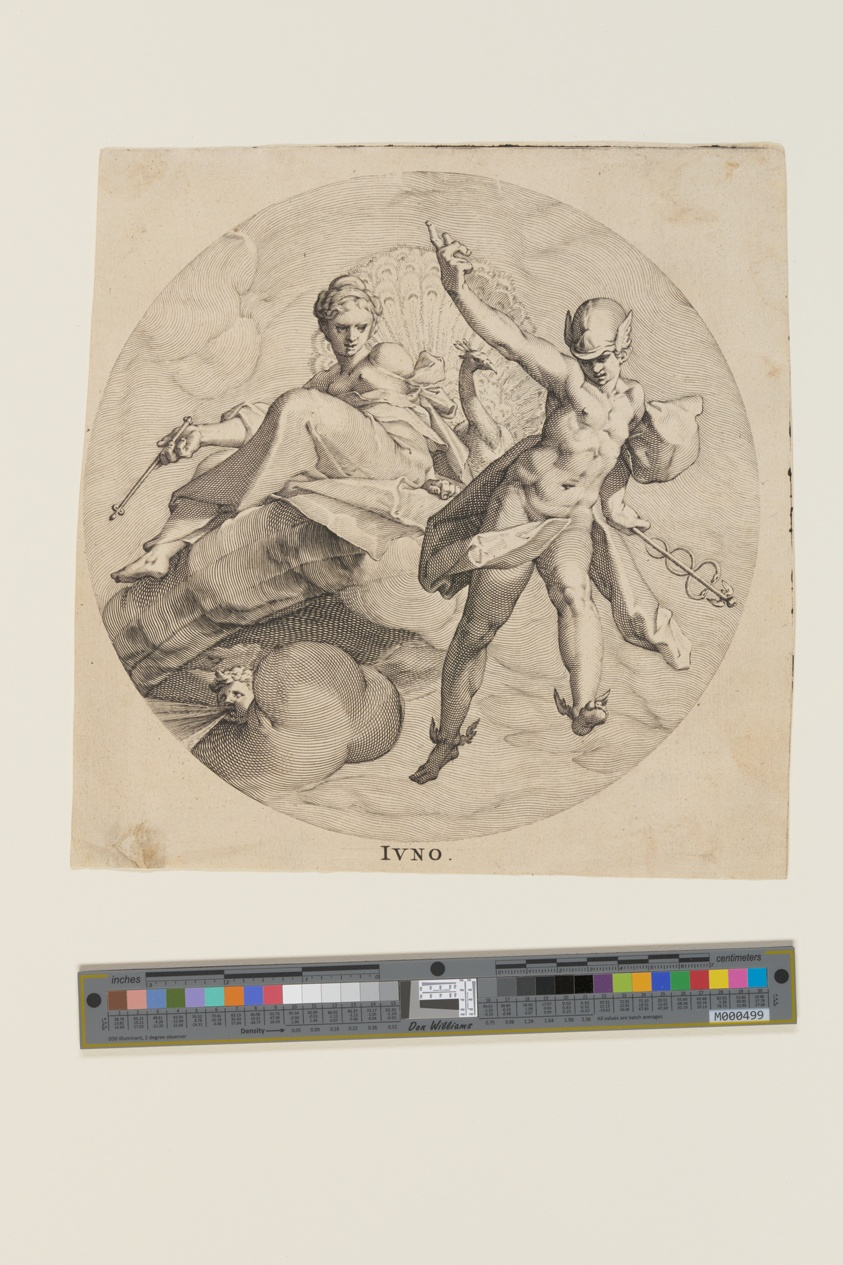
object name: Print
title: Juno, from The Three Goddesses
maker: Egbert van Panderen (Dutch, c. 1581–1628); after Bartholomeus Spranger (Flemish, 1546–1611)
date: c. 1600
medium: Engraving on ivory laid paper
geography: Netherlands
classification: print; paper; prints and drawing; engraving